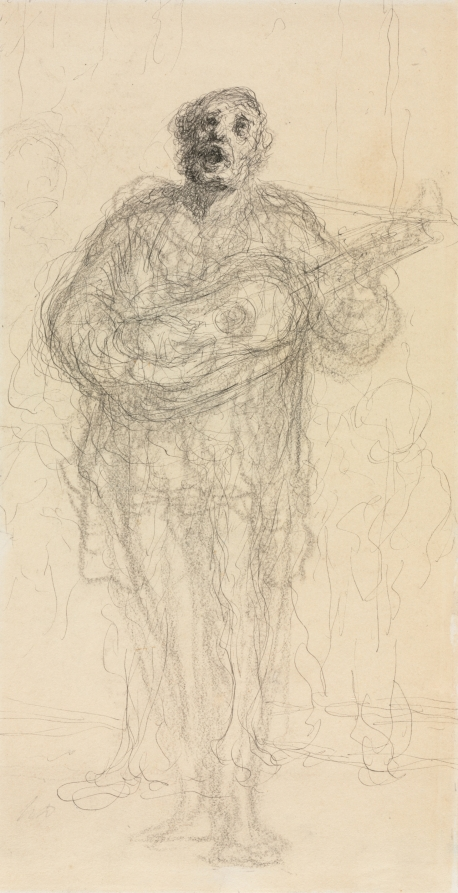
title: Singing Guitarist (recto)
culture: France, 19th century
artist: Honoré Daumier (French, 1808–1879)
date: 1855–60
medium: pen and black ink over charcoal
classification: Drawing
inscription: signed, lower left, in black charcoal?: hD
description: The first six-string guitars appeared simultaneously in Naples and Paris in the 1770s, and by the end of the 19th century the so-called Romantic guitar played a central role in the popular music of the French capital. Daumier’s drawing reflects this interest in street singers and carnival performers. The agitated, almost frenetic tangle of fine lines drawn in pen and ink imbues the figure with life, so that his voice and instrument seem to vibrate with emotion.